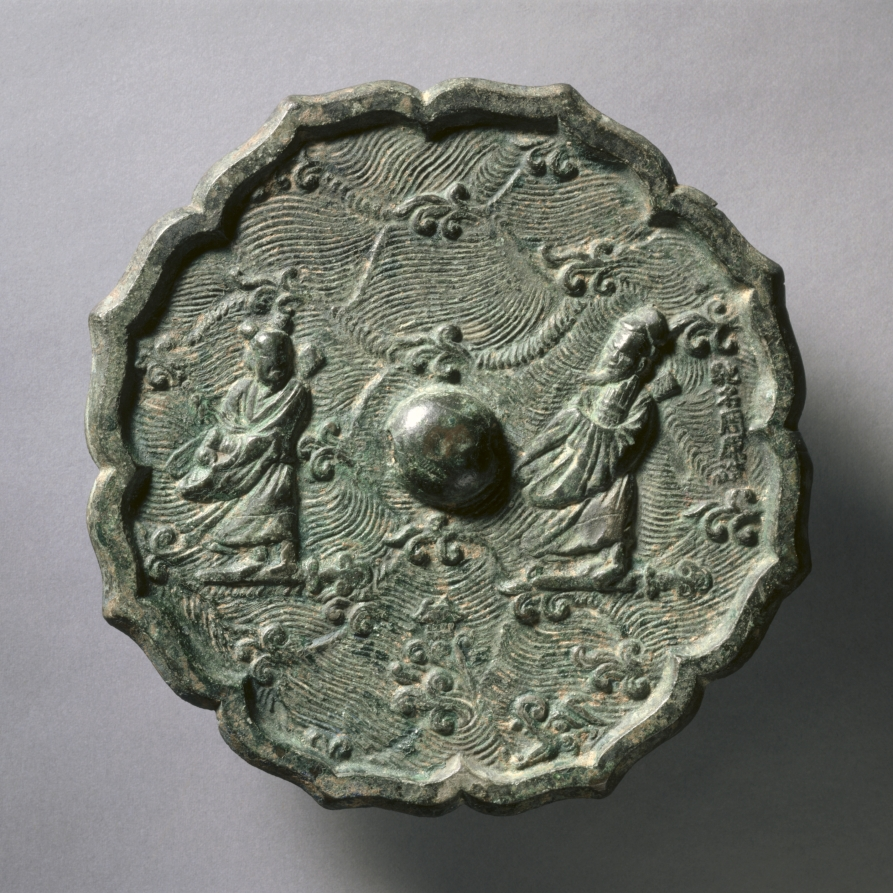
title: Octafoil Mirror with Two Immortals Crossing the Ocean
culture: China, Song dynasty (960-1279)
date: mid-900s–late 1200s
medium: bronze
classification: Metalwork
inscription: Made by the famous Zhou Yuan.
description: This mirror in the shape of a flower represents two immortals crossing the ocean, surrounded by surging waves. The younger figure on the left wears two buns on his head; the elder one with a long beard is carrying a musical instrument, sheng. The scene may illustrate “The Eight Immortals Crossing the Ocean,” in which their supernatural power to walk on water is depicted. The two men here stand on their swords to travel on water. In Daoist and Buddhist thinking, swords are considered powerful, magical implements to exorcise demons and destroy evil spirits.